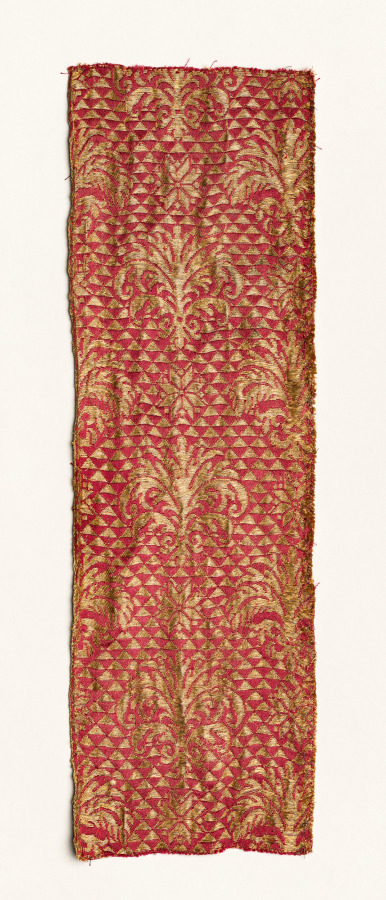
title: Fragment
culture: Africa, North Africa, Egypt, Mamluk Sultanate (1250–1517), Egyptian weaver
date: probably 1500s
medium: Silk, gold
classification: Textile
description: This fragment is made of silk, with gold thread. It is woven in a complex technique called lampas weave.